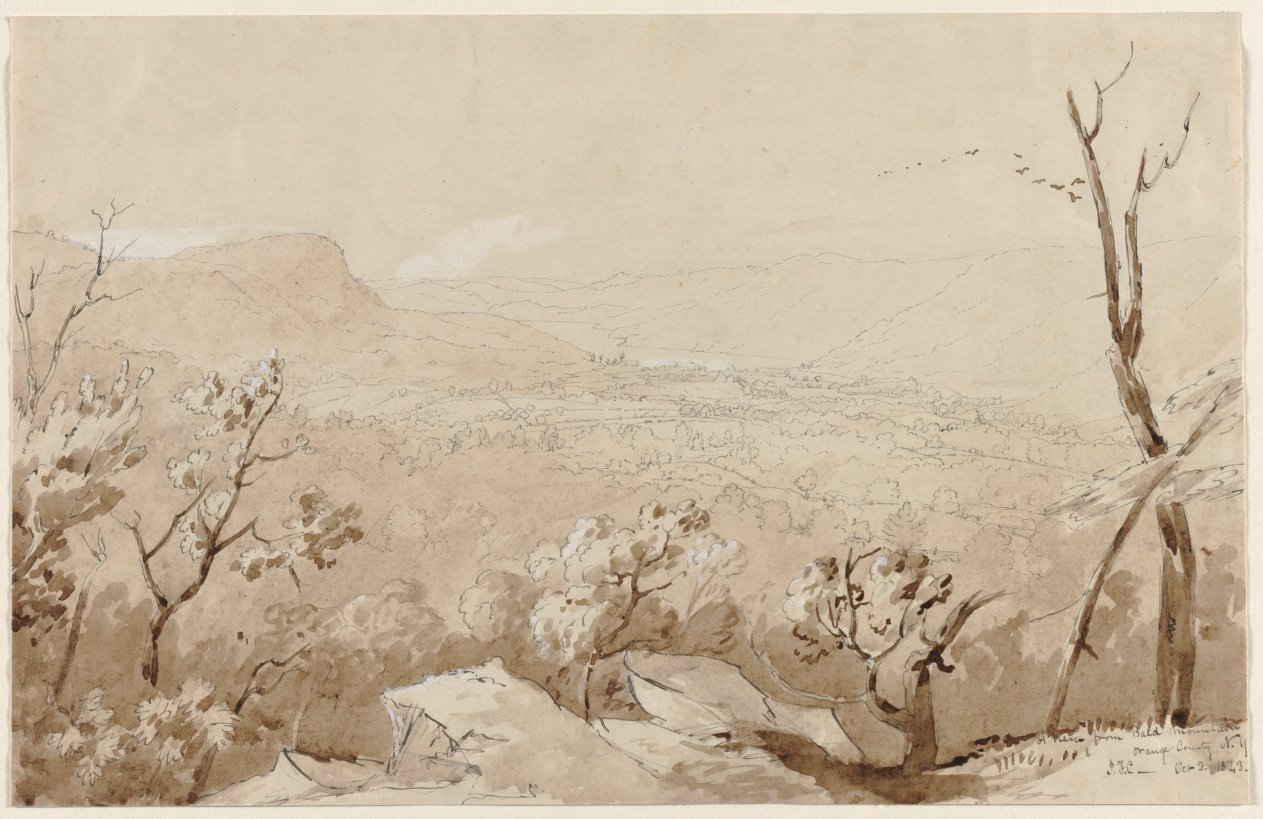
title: A View from Bald Mountain, Orange County, N.Y.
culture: America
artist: Jasper F. Cropsey (American, 1823–1900)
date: 1843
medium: pen and black ink, and brown wash heightened with white, over traces of graphite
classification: Drawing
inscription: Signed, lower right, in black ink: "A View from Bald Mountain/Orange County N.Y/J. F. C. Oct 3. 1843"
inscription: On verso, by artist, across center, in graphite: "A View from Bald Mountain with Long Pond in the distance/ Orange County N.Y. /Oct 3rd 1843 [year underlined]"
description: Cropsey practiced architecture but painted in his spare time, exhibiting a landscape painting to favorable reviews at the National of Design, New York, in 1843. This view of Orange County, New York, is one of Cropsey’s earliest known works. Commanding trees and rocks in the foreground are rapidly indicated, while carefully rendered topographical details in the distant landscape reveal greater attention to nature’s complexity and expanse. This drawing provided the basis for an oil painting of 1845, View of Greenwood Lake, New Jersey. Cropsey became a leading artist of the Hudson River school in the 1840s and 1850s.